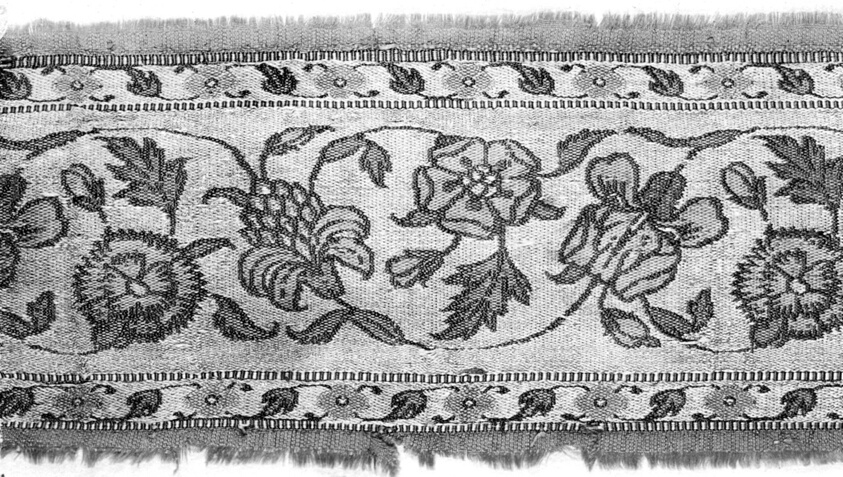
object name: Textile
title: Fragment (Border)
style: isfahan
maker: Iran (Persia, Isfahan)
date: 17th century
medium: Brocaded compound cloth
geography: Iran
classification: textile; weaving